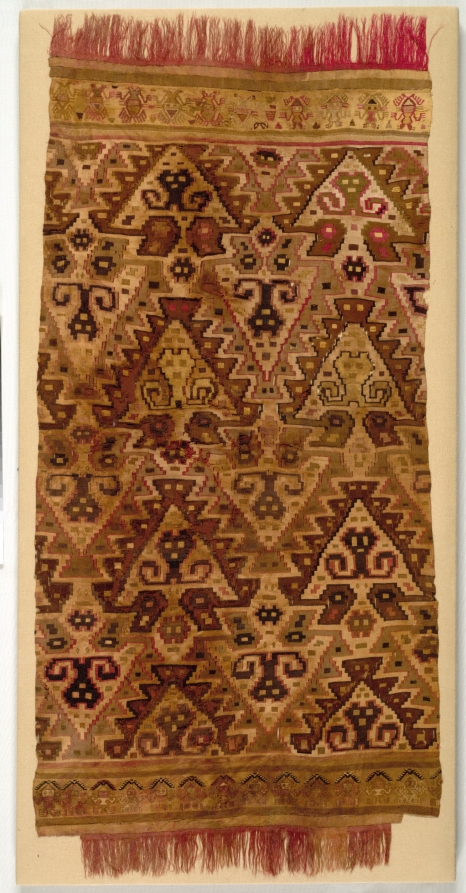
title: Tapestry Panel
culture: Peru, Central Coast, Chancay-Chimú style, 11th-15th century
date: 1000–1460s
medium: camelid fiber and cotton, tapestry weave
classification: Tapestry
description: The design of this panel depends on the repetition of a single motif: a small, geometricized head set inside a stepped V, which seems to represent the stylized bodies and wings of two birds. This motif, woven in different color combinations, alternates between up and down to form a sophisticated interlocking pattern that has no proper top and bottom. The panel probably once belonged to a garment.